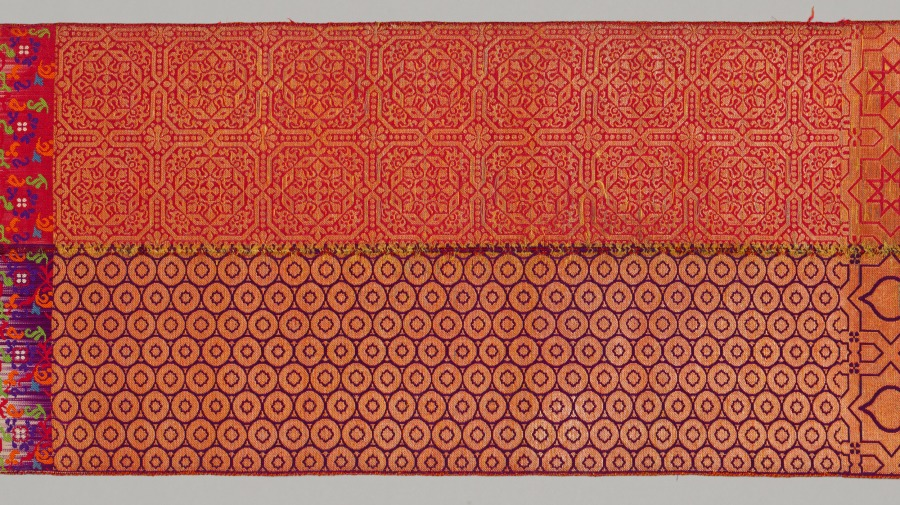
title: Belt (Hizam)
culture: Africa, North Africa, Morocco, Fes, Moroccan weaver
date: 1800s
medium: Silk, dye, metal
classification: Textile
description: Elaborate wedding sashes woven in Fez, Morocco, are distinctive for their multiple colors, designs, and uses. Folded lengthwise, they are wrapped around the waist so that the colors and designs coordinate with the attire worn during and after a wedding. Typically, the colors vary on each half although the designs are the same. Luxury textiles with elaborate patterns were woven on large looms called drawlooms that automatically repeated designs. The weaver operated the structure, inserting horizontal wefts, while the drawboy activated the programmed pattern. However, this wedding sash has ten programmed designs, which required considerable expertise.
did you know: Women sometimes added starch to stiffen these belts.